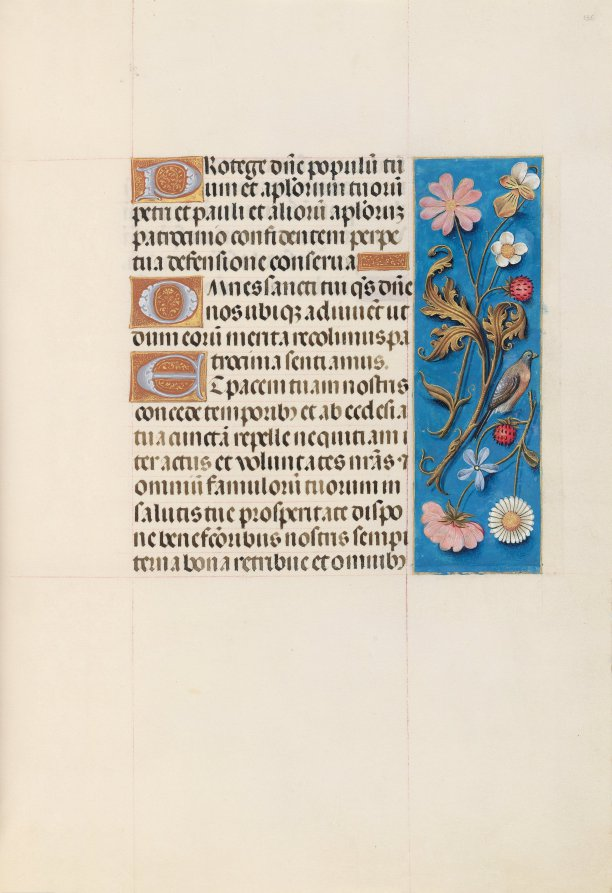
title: Hours of Queen Isabella the Catholic, Queen of Spain: Fol. 135r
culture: Flanders, Ghent and Bruges, late 15th century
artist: Master of the First Prayerbook of Maximillian (Flemish, c. 1444–1519)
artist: and Associates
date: c. 1500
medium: ink, tempera, and gold on vellum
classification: Bound Volume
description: This manuscript was illuminated by a circle of at least five highly organized manuscript painters active in the Flemish cities of Ghent and Bruges. The principal illuminator was Alexander Bening, who painted the majority of the book's miniatures. Manuscripts produced by this circle of artists are renowned for the decoration of their borders, which typically feature a rich variety of realistically-painted flowers, birds, and butterflies. This prayer book, called a book of hours, was intended not for a cleric, but for the private devotions of a lay person-in this case, Isabella the Catholic, Queen of Spain (1451-1504). Isabella's coat of arms embellishes the book's frontispiece. It is unlikely that the book was commissioned by the Queen herself; rather, she probably received it as a diplomatic gift from someone courting her patronage, perhaps Cardinal Francisco Jimenez de Cisneros. A Franciscan friar, Jimenez was dependent upon Isabella for his advancement, first to the post of Queen's confessor in 1492, and then to Archbishop of Toledo in 1495.